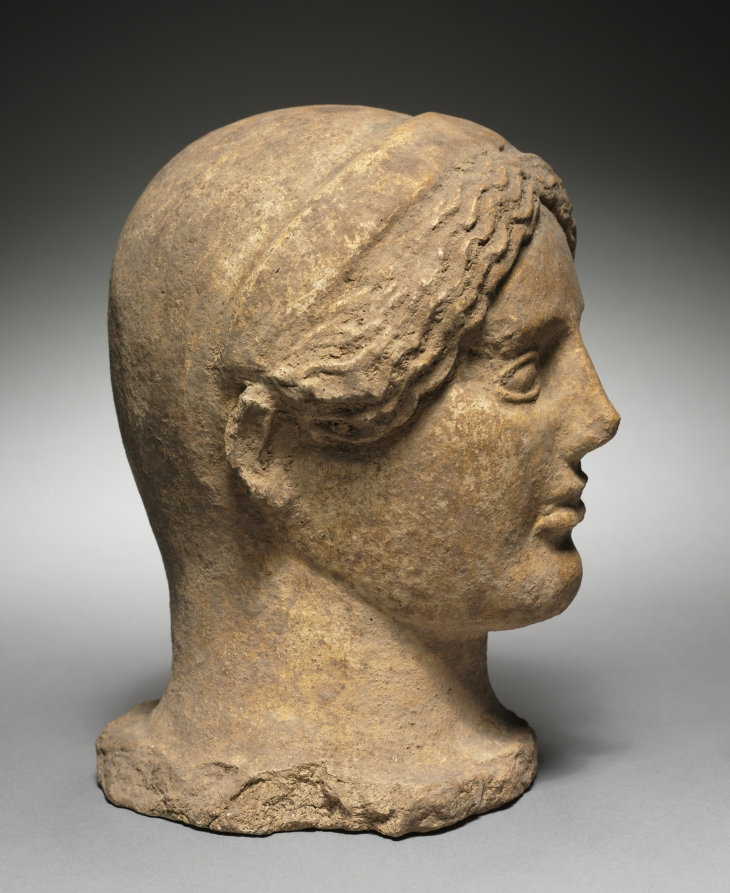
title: Head of a Woman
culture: Etruscan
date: 500–475 BCE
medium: terracotta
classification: Sculpture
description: Probably created for use as a votive dedication, or an offering to a deity, this mold-made female head tops a broad neck spreading into a flat base; no bust or body was intended. The wavy hair, parted in the center, drapes before the ears and beneath a simple headband, framing the face and emphasizing the frontal view. Although three-dimensional, the head is unworked on its back half.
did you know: This sculpture is an example of ancient mass production, as many identical heads could be made from one mold.